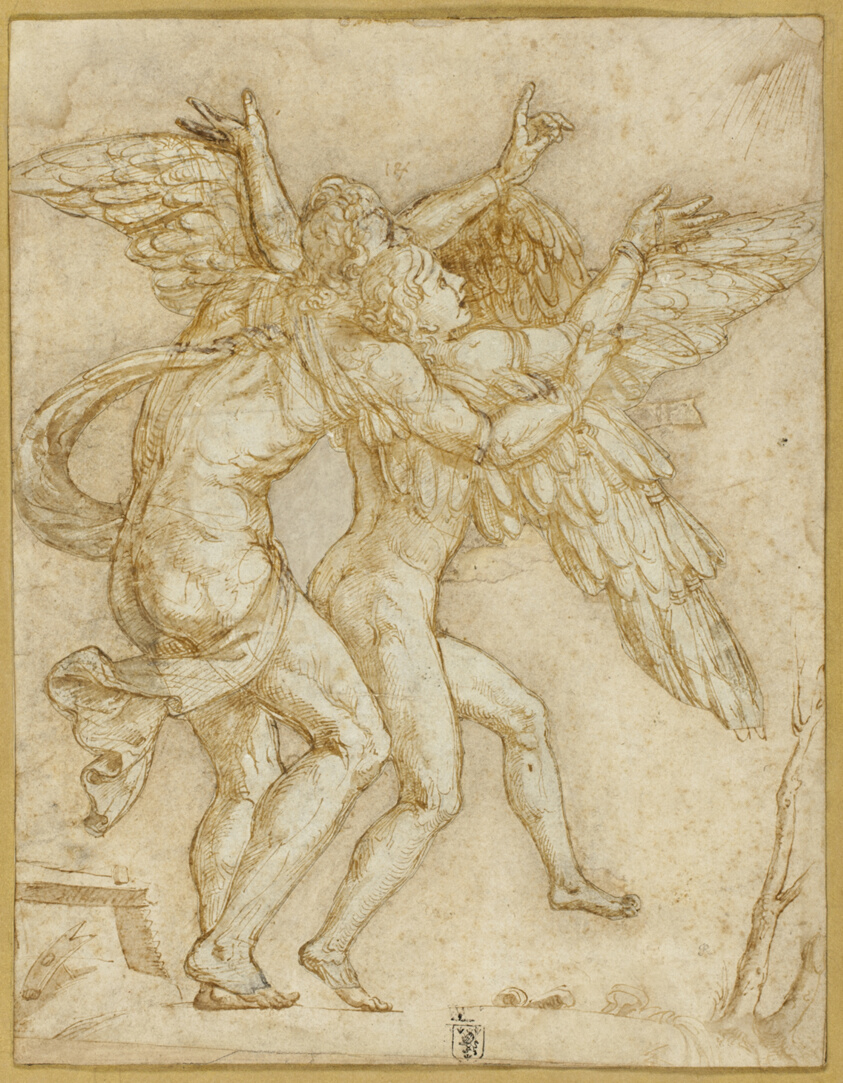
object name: Drawing and Watercolor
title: Daedalus and Icarus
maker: Giulio Pippi, called Giulio Romano; Italian, c. 1499-1546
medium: Pen and brown ink with brush and brown wash, heightened with touches of lead white, over traces of black chalk, on ivory laid paper, with stray graphite marks, cut out and laid down on cream laid paper, laid down on tan laid card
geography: Italy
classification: pen and ink drawings; drawings (visual works); prints and drawing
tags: Greek, mythology, prints and drawings